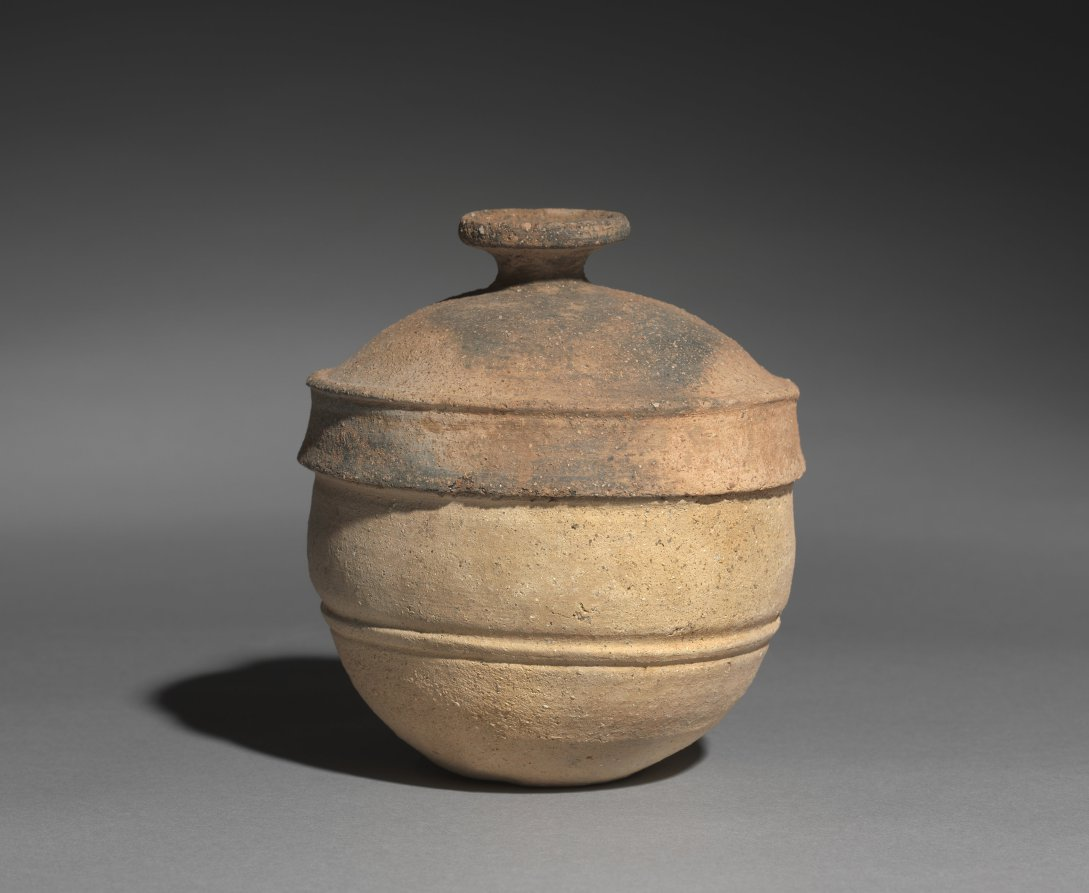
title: Lidded Jar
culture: Korea, Silla (57 BC-935) or Kaya (AD 42-562) period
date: 400s–500s CE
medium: red earthenware with incised band designs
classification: Ceramic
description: Early earthenware from the Three Kingdoms period (57 BCE–668) became widely utilized as agriculture and religion grew to be essential elements in sustaining society and its systems. The clay jars of different sizes and shapes on display were made for the following purposes: some were used to store harvested grains and seeds, some, especially lidded ones such as this, to preserve cremated remains, and some to serve offerings in rituals.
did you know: Closed kilns built on hillsides became widely used for producing this type of pottery vessel in Korea during the Three Kingdoms period.